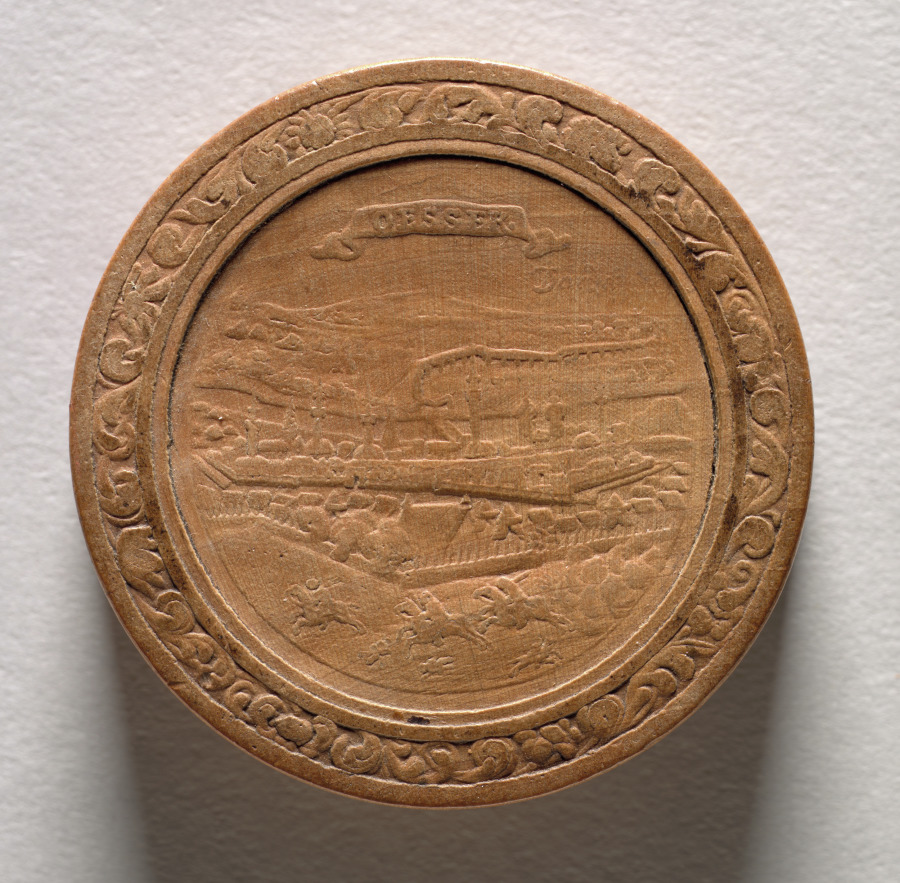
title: Gaming Piece (obverse)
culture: Germany, late 17th-early 18th Century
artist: Martin Brunner (German, 1659–1725)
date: c.1700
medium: wood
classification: Furniture and woodwork